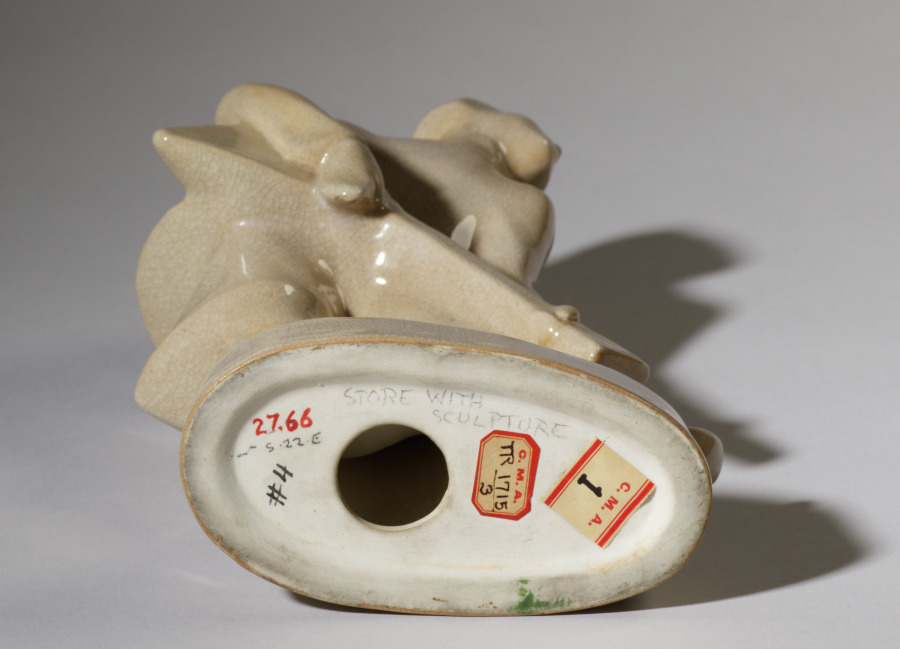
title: Balalaika Player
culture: America, Ohio, Cleveland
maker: Cowan Pottery Studio (America, Rocky River, Ohio, 1920–1931)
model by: Alexander Blazys (American, born Russian Empire [now Lithuania], 1894–1963)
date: 1927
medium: mold-made ceramic, glazed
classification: Ceramic